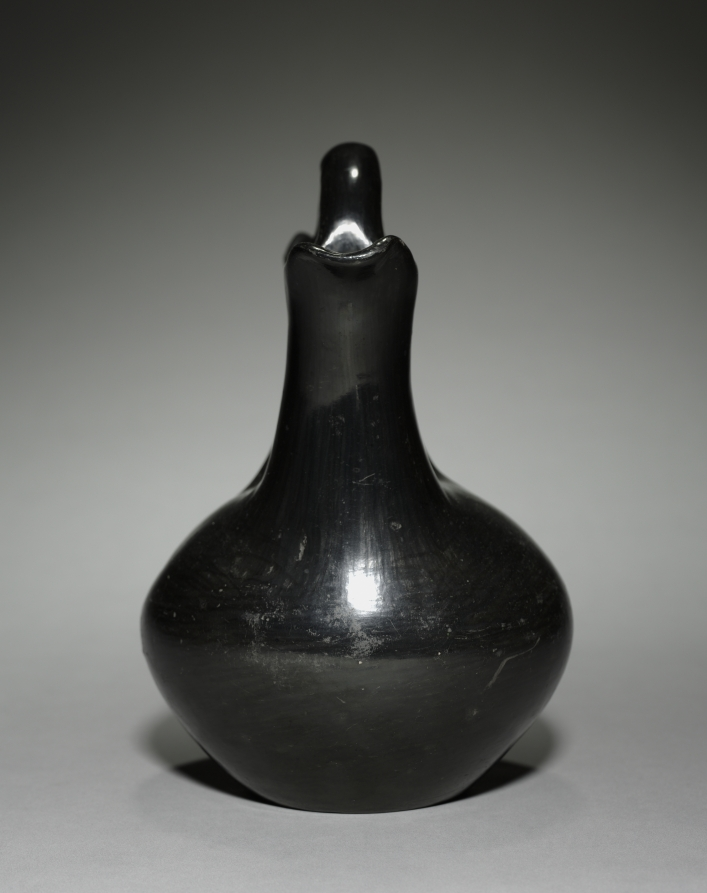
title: Wedding Jar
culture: Southwest, Pueblo, Santa Clara, Post-Contact, 20th century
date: c. 1900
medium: ceramic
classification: Ceramic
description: At Santa Clara Pueblo, the double-spouted wedding jar is made not only to sell but also for use during its namesake ceremony, when the bride and groom drink from opposite spouts. The origin of the unusual form is unclear; once considered a modern innovation, it may instead be an ancient form revived in the late 1800s, perhaps in response to market forces that tourism set in play. This example is made from the black ware for which Santa Clara potters are known.